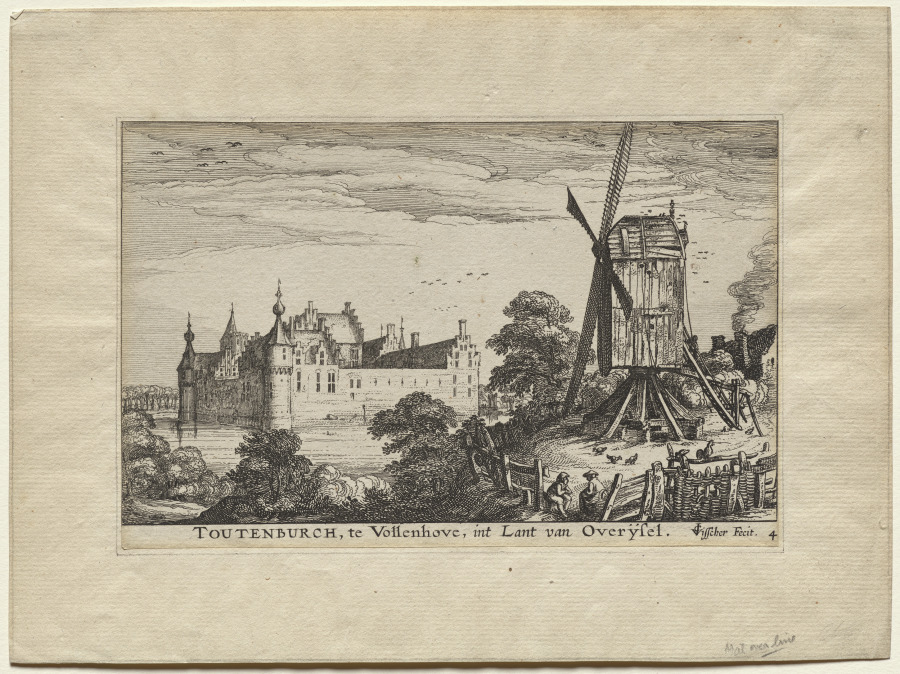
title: Four Castles in Holland and Utrecht: The Castle Toutenburgh in Vollenhove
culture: Netherlands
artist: Claes Jansz Visscher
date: c. 1617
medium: etching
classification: Print